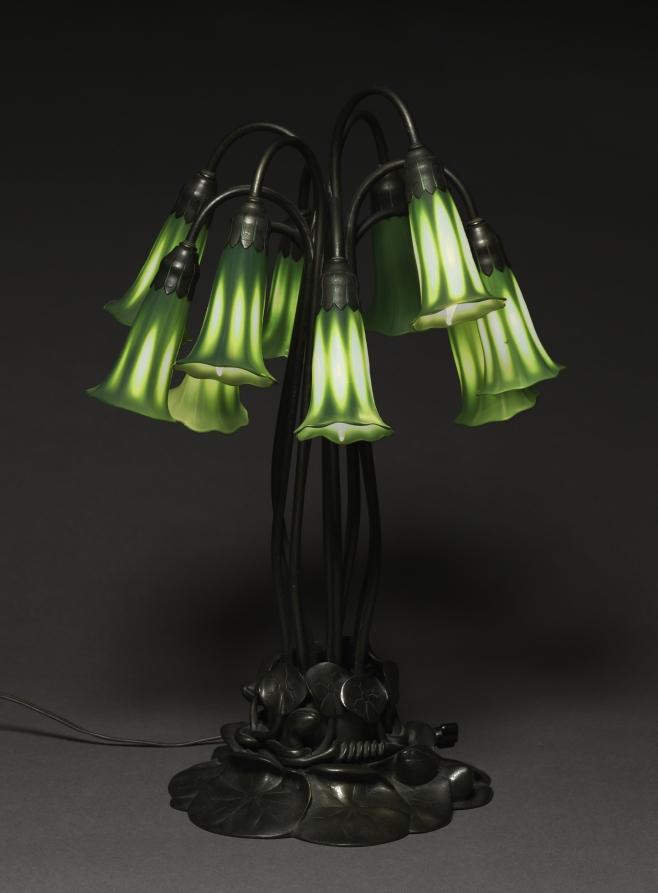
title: Pond Lily Table Lamp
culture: America, New York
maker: Tiffany Studios (United States, New York, 1902–32)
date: c. 1902–10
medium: Favrile glass, bronze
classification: Lamp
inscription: Shades etched: L.C.T.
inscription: stamped on bottom: Tiffany Studios/New York/3(?)8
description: The dawn of the 20th century spurred fresh approaches to design. Louis Comfort Tiffany’s great contribution to this new art movement, termed the Art Nouveau, was not only the shimmering iridescence of his Favrile glass but also the naturalistic compositions of his lamps and windows, which brought him commercial and critical success in both Europe and America. Symbolic themes, such as this lamp's dark blooms of the pond lily in a swampy landscape, became a hallmark of Tiffany's Art Nouveau design. It won a grand prize for Tiffany Studios at the 1902 international exposition in Turin, Italy.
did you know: The dawn of electricity made this lamp possible, transforming a work of sculpture into a useful object.